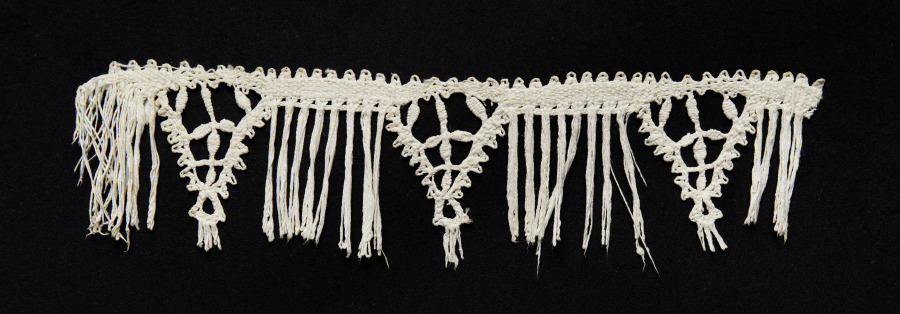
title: Lace Edging of Points and Fringe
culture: Italy, Genoa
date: 1550–99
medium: Bobbin lace (needle lace, reticella design)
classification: Lace